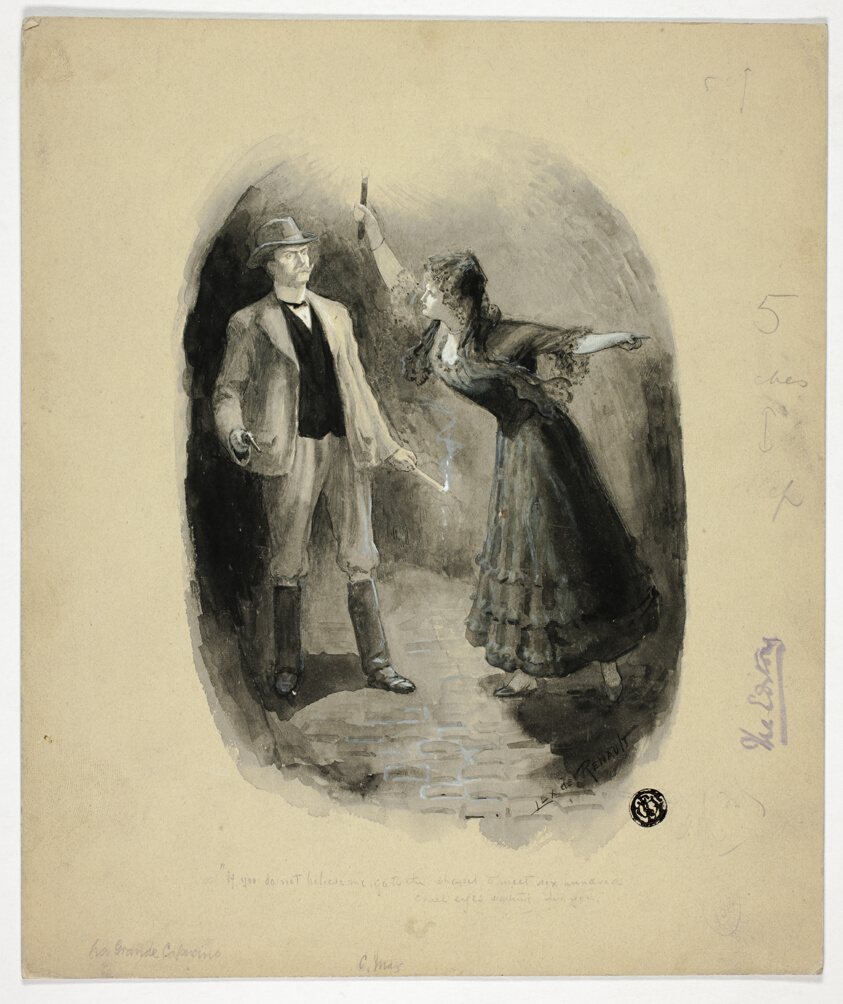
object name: Drawing and Watercolor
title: La Grande Capucine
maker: Lex de Renault (English, active 1898-1908)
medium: Brush and black gouache, heightened with white gouache, over traces of graphite, on tan wove card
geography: England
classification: gouache; drawings (visual works); prints and drawing